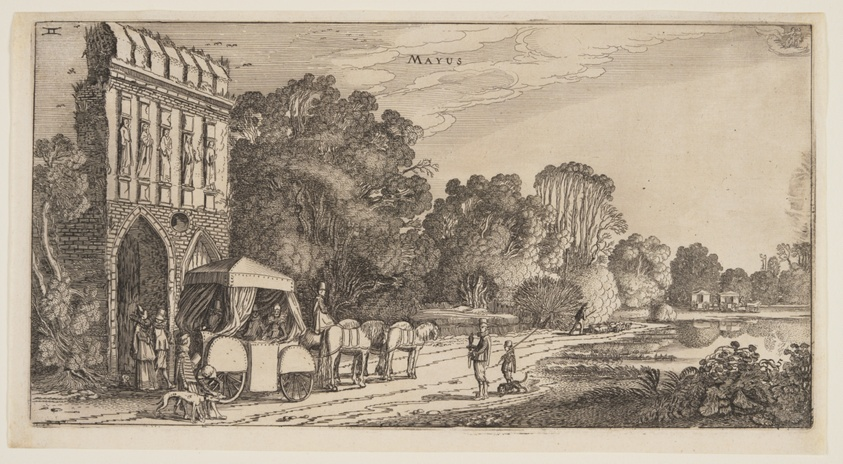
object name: Print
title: May, from The Twelve Months of the Year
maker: Jan van de Velde II (Dutch, c. 1593–1641); after Willem Buytewech (Dutch, c. 1591–1624)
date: 1616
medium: Etching on ivory laid paper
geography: Netherlands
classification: etching; paper; print; prints and drawing